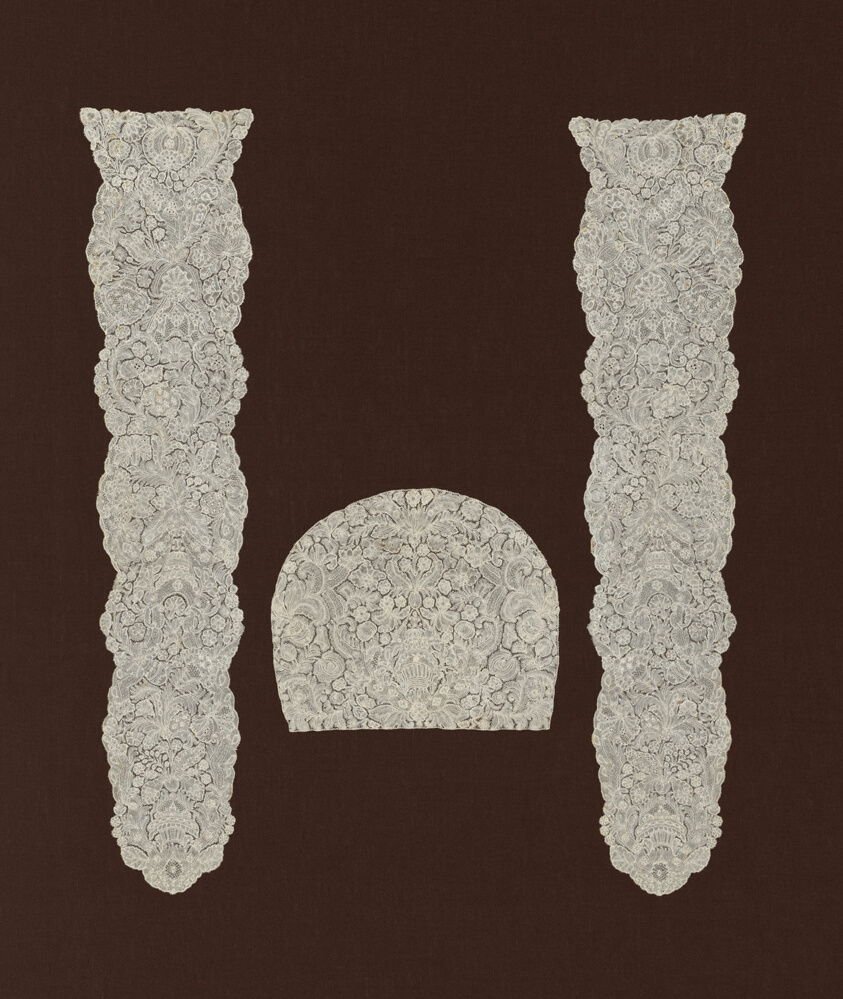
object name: Costume and Accessories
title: Lappet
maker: Flanders, Brussels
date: 1730s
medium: Linen, bobbin part lace of a type known as "Brussels" [with a twisted bar ground?]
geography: Brussels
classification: costume accessory; lace - bobbin; textile; costume; costume accessory - headdress; costume accessory worn above the waist